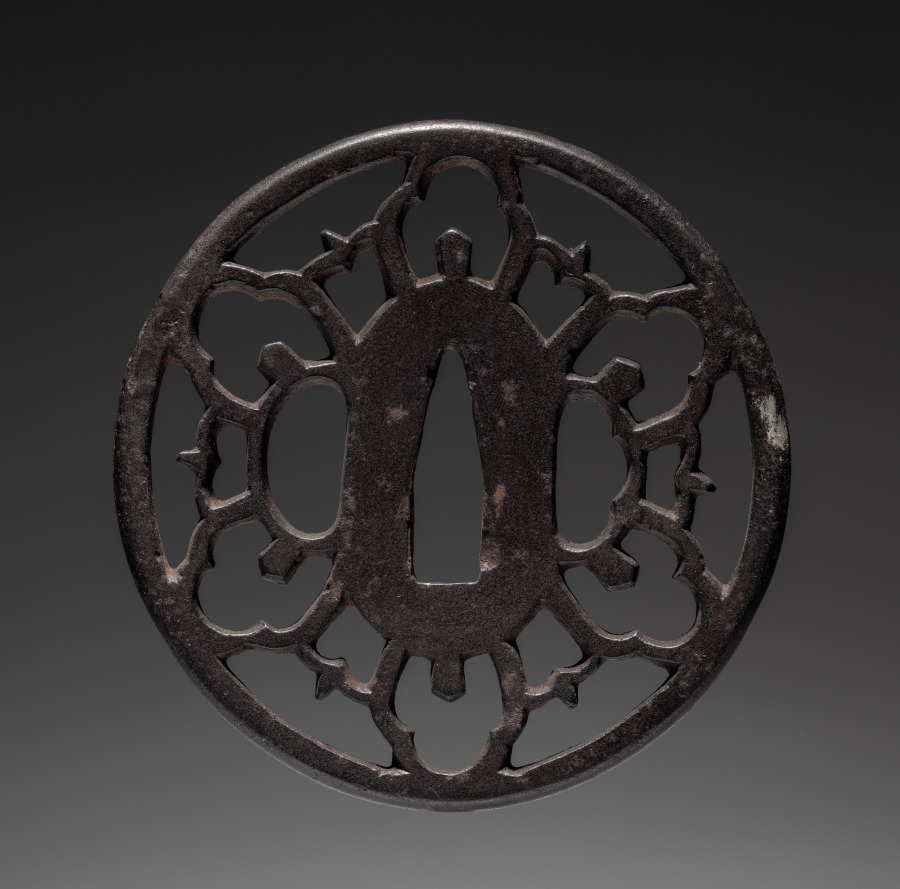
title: Sword Guard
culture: Japan, Edo period (1615–1868)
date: 1615–1868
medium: iron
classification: Arms and Armor